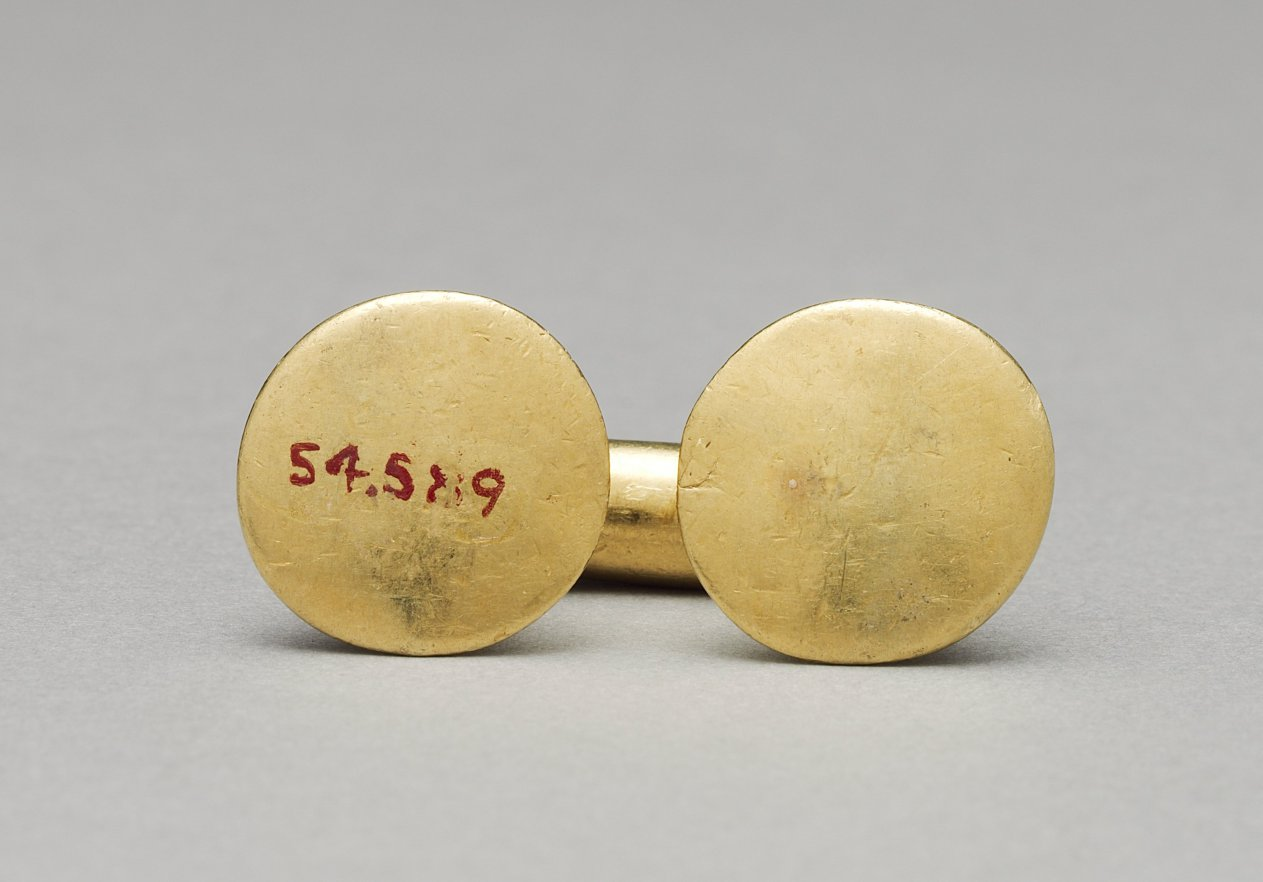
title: Nose Ornament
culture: Colombia, Sinú style, 5th-11th century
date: c. 400–1000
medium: hammered gold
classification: Jewelry